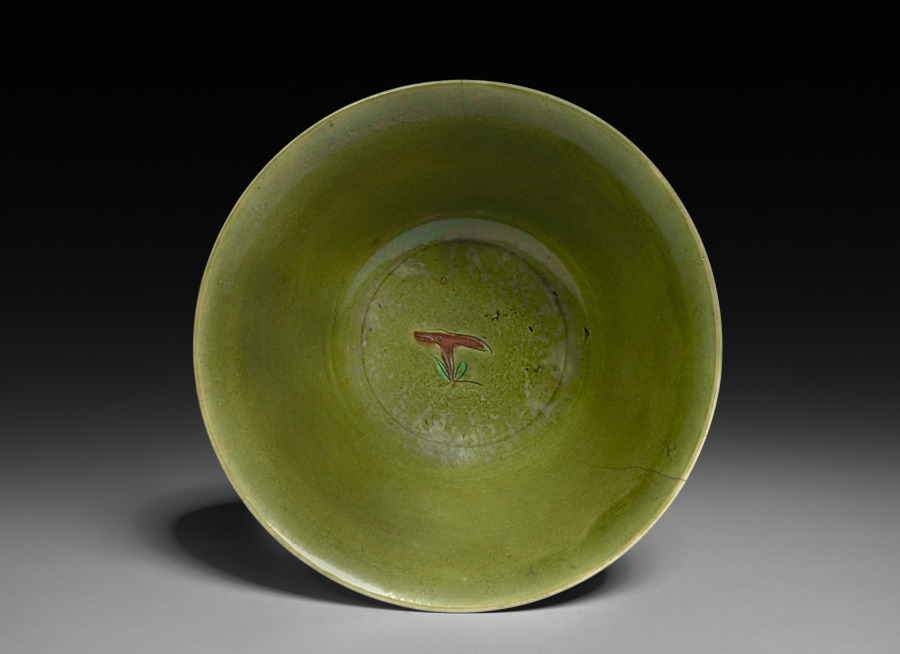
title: Brinjal Bowl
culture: China, Ming dynasty (1368–1644) to Qing dynasty (1644–1911)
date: 1368–1644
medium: white porcelain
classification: Ceramic